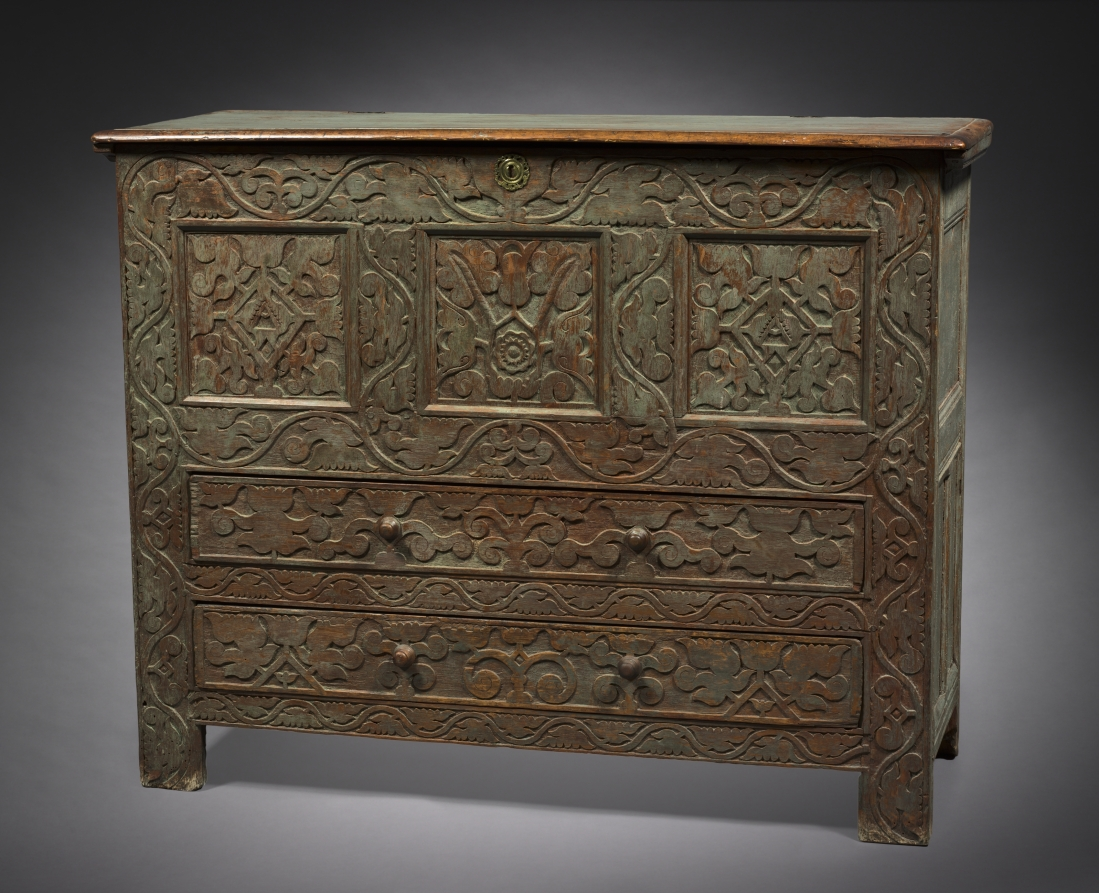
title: Chest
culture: America, Massachusetts, Connecticut River Valley (Hampshire county), late 17th - early 18th century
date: 1690–1720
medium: oak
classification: Furniture and woodwork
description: Lift-top storage chests with drawers are one of the most typical furniture forms of the 1700s. Although this chest was clearly made by someone far removed from more sophisticated English examples, its maker produced a distinctly energetic form. The carved decoration includes an intricate tulip-and-leaf pattern. The letters "AA" in the center of the blocks on either side of the central motif indicate the chest was probably made for a young woman with those initials.